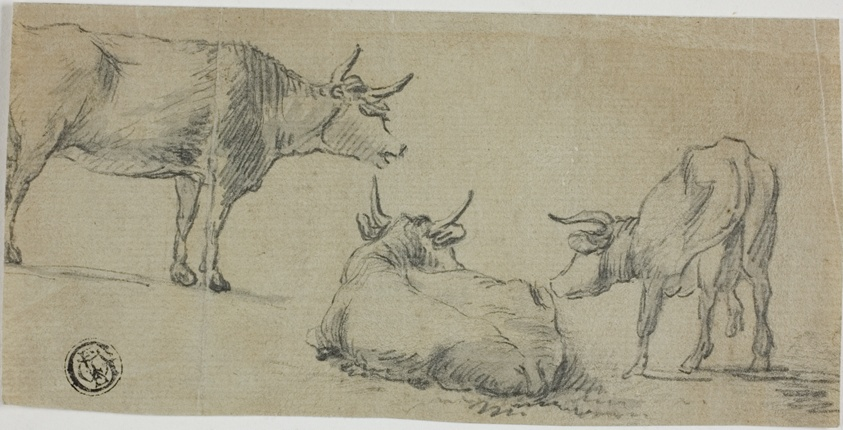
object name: Drawing and Watercolor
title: Three Sketches of Cows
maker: After Aelbert Cuyp; Dutch, 1620-1691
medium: Graphite with brush and gray wash, on tan laid paper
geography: Holland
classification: graphite; drawings (visual works); prints and drawing